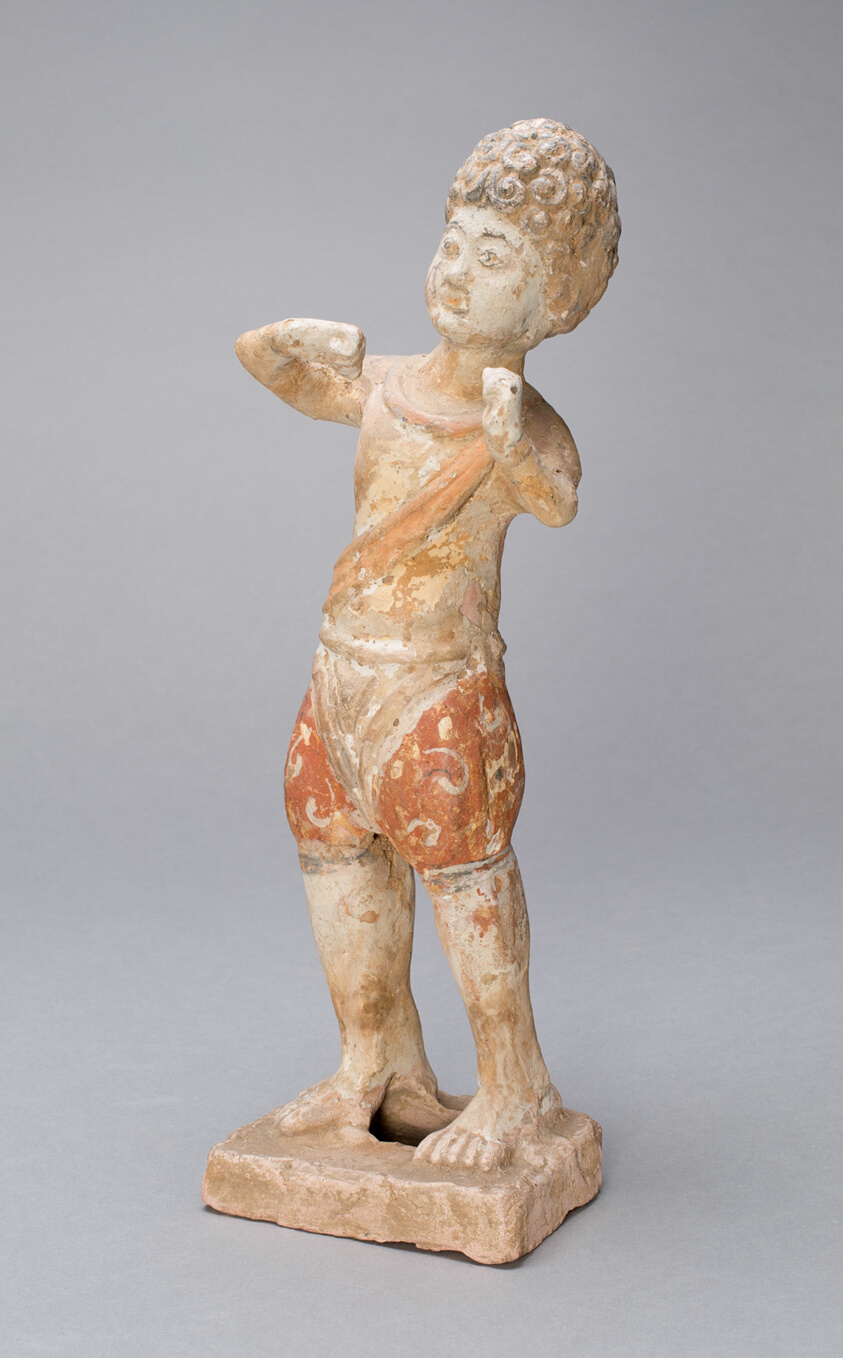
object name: Sculpture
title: Curly-Haired Youth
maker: China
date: Style of Tang dynasty (618–906)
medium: Earthenware with traces of pigment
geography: China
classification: ceramics; asian art